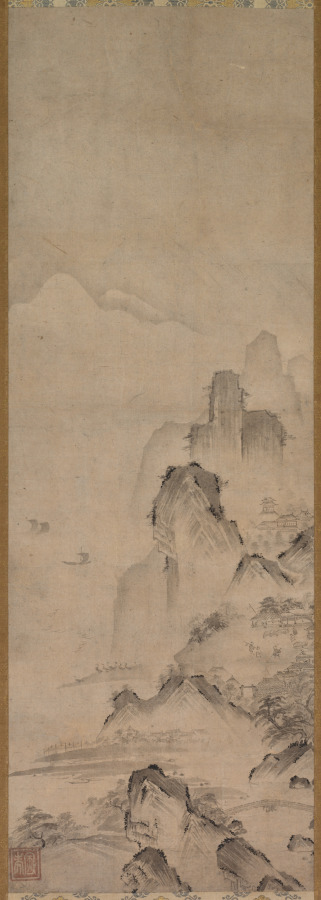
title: Landscape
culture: Japan, Muromachi period (1392–1573)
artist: Narihide (Japanese, active 1500s)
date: 1500s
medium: hanging scroll; ink on paper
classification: Painting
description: This composition includes imagery from the Eight Views of the Xiao and Xiang Rivers. Scanning the composition from top to bottom, at least six of the views are discernible: night rain over Xiao and Xiang, evening bell from a mist-shrouded temple, returning sails off a distant shore, geese descending to a sandbar, mountain village in clearing mist, and sunset glow over a fishing village. Inside the painting’s box is a document with a long inscription by prominent calligrapher, collector, and connoisseur Maeda Kōsetsu (1841–1916) discussing the painting’s subject and the matter of the painter’s biography—he appears to have been a Kano school artist, but his precise identity is unclear.